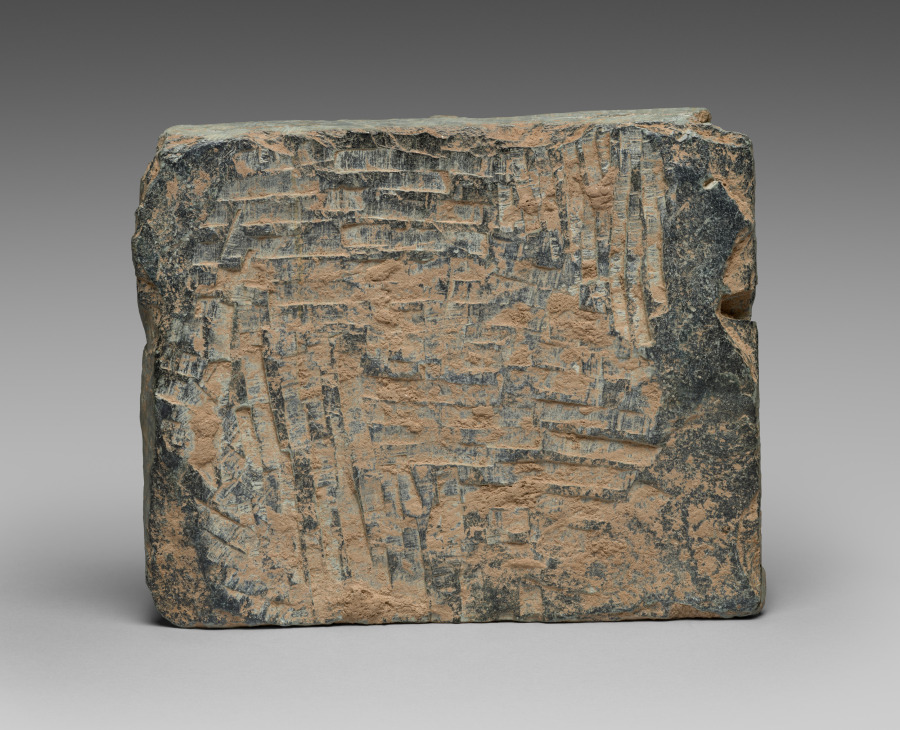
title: The Great Miracle at Shravasti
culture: Pakistan, Gandhara, Peshawar Valley, early Kushan period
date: c. 100 CE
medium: schist with traces of gold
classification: Sculpture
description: After the Buddha reached enlightenment, he spent the remainder of his life traveling around northeastern India, giving teachings and performing miracles in order to convert followers and establish the Buddhist community. One of his most famous miracles is when he levitated and caused fire to leap from his shoulders and water to flow from his feet. The figures of two monks kneel in worship. Others press their hands together in a sign of devotion and submission, while the figures on the outer edges whistle and shake their upper garments, as was customary when an amazing sight was seen.